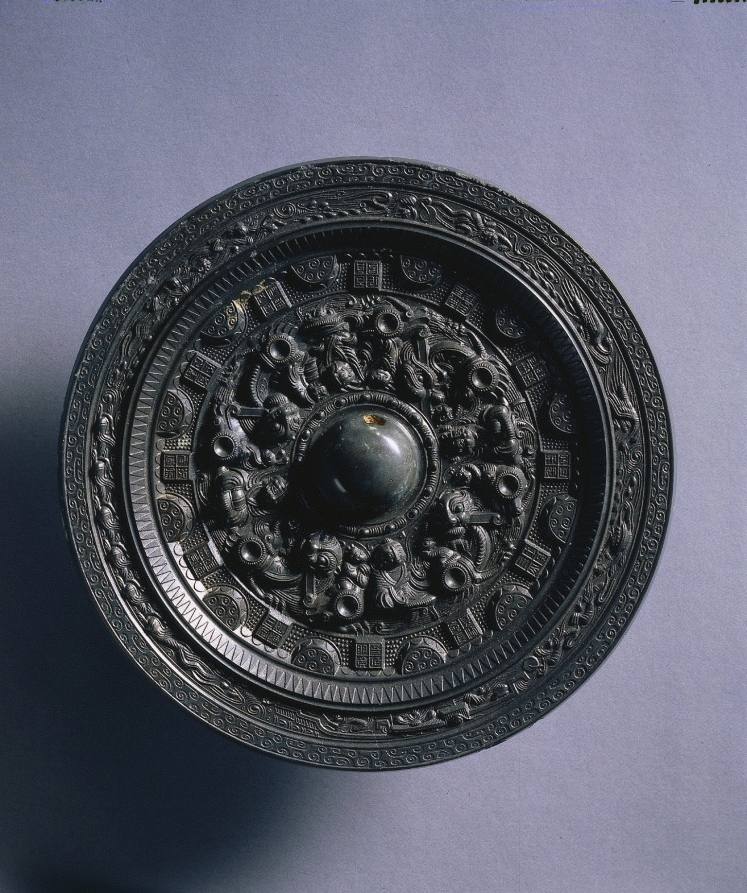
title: Mirror with Deities and Animals Surrounded by Rings of Squares and Semicircles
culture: China, Eastern Han dynasty (25–220 CE)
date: late 100s CE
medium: bronze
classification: Metalwork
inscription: 吾作明鏡，幽涑三岡。配仙世袁，紡德序道， 敬奉臣（賢）良。同（銅）刻無極。 百牙作樂，眾祥主陽。世照光明， 壽如金石，位至三公，其師命長。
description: Inscription: I made this bright mirror, By refining three metals. It is fitting for immortals, distant from the worldlings, And for those who are in command of virtues and the Way. Here too we will find respect for the wise and the able. They can be engraved in infinite ways. Here is BoYa playing the music. A multitude of fortunes underscore the yang force. The mirror shines brightly on the world. May you live long as the metal and stone. May you reach the height of dukedom. Even this master be given to live a long life.